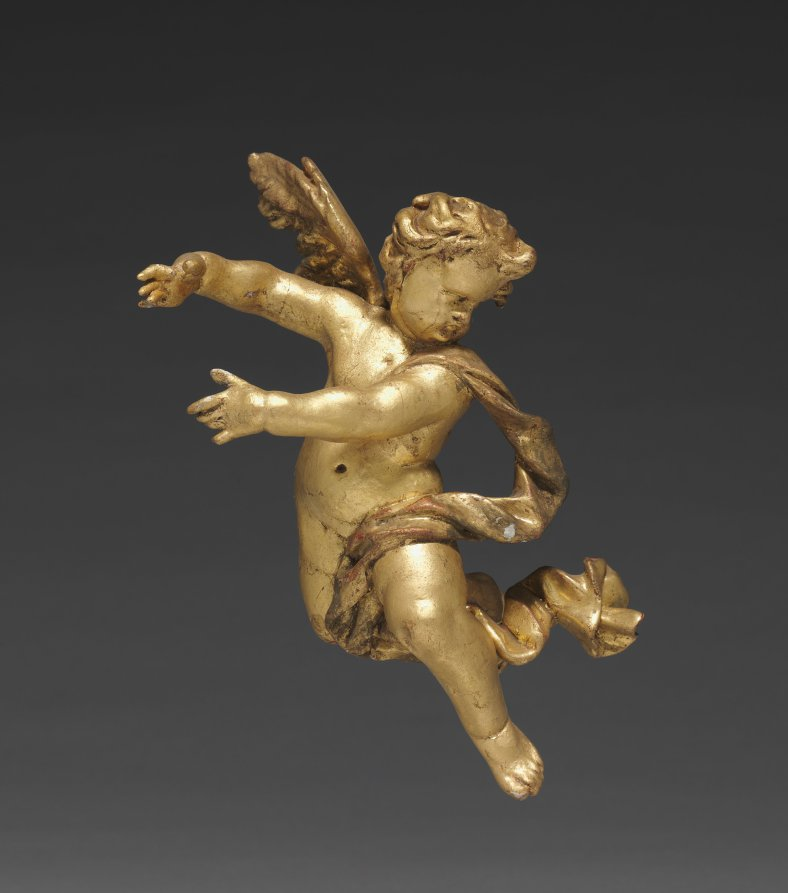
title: Altarpiece with Relics - Putto with column, upper right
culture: Germany, Bavaria, 18th century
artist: Joseph Matthias Götz (German, 1696–1760)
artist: and Workshop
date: 1735–1740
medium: gilded wood, with relics in niches: gilded wood, mother-of-pearl, ebony, red silk, gold wire, seed pearls, rock crystal, pen and ink on paper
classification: Sculpture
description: Götz covers every surface in gold leaf, giving each part of the object equal importance, rather than simply framing a central picture. In this distinctively Central European approach, figural narrative is subordinate to the overall ensemble. Götz designed this object to rest on top of an altar, probably in front of a larger painted or sculpted decorative scheme. The work contains relics seen through the small windows on the perimeter. These small remains of holy figures demonstrate the persistence of a medieval Catholic tradition well into the 1700s.